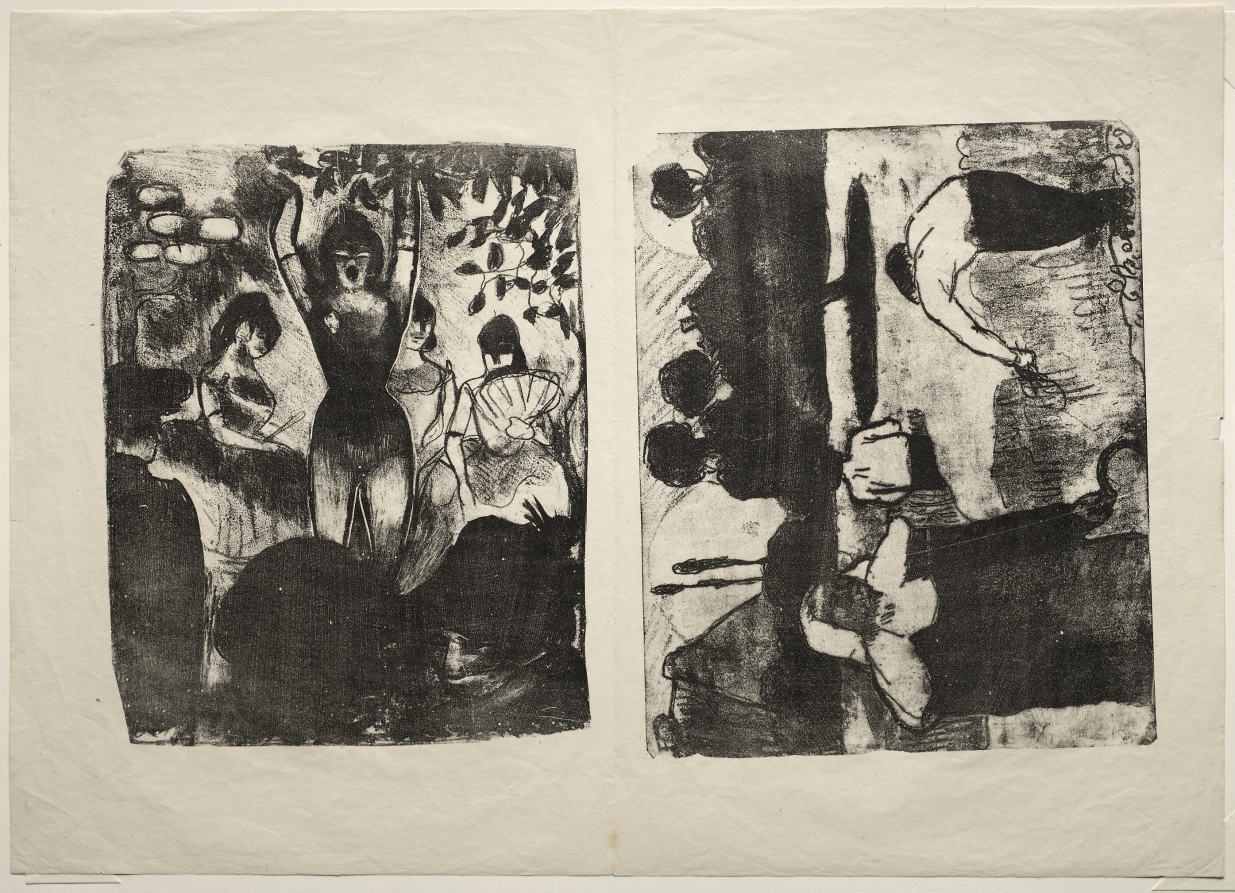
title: Singer at the Café-Concert and The Harvesters (Les Moissonneurs)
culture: France, 19th century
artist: Émile Bernard (French, 1868–1941)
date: 1888, printed 1896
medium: lithograph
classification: Print